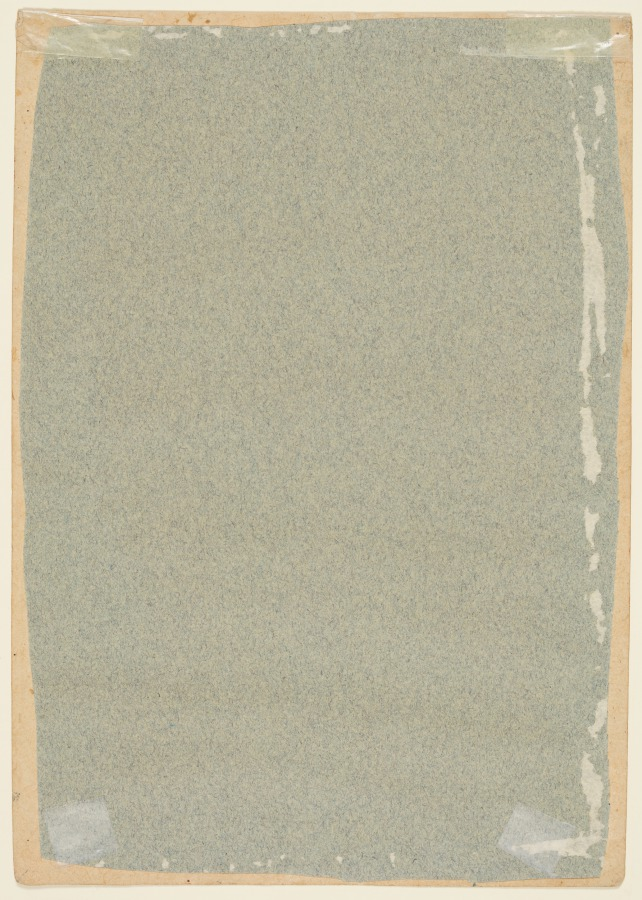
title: The Morning Toilette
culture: Northern India, Pahari kingdoms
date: 1810–25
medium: gum tempera and gold on paper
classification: Painting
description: A lady, dressed in white below the waist, admires herself in a mirror held by a handmaiden. Three other ladies attend to her toilette. She stands on a large wooden stool and raises her elbow high to adjust her earrings, providing the beholder with a glimpse of her round breasts. Ewers and water pots can be seen in the foreground.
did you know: The costume of the handmaiden holding the mirror is inspired by older Chamba paintings.